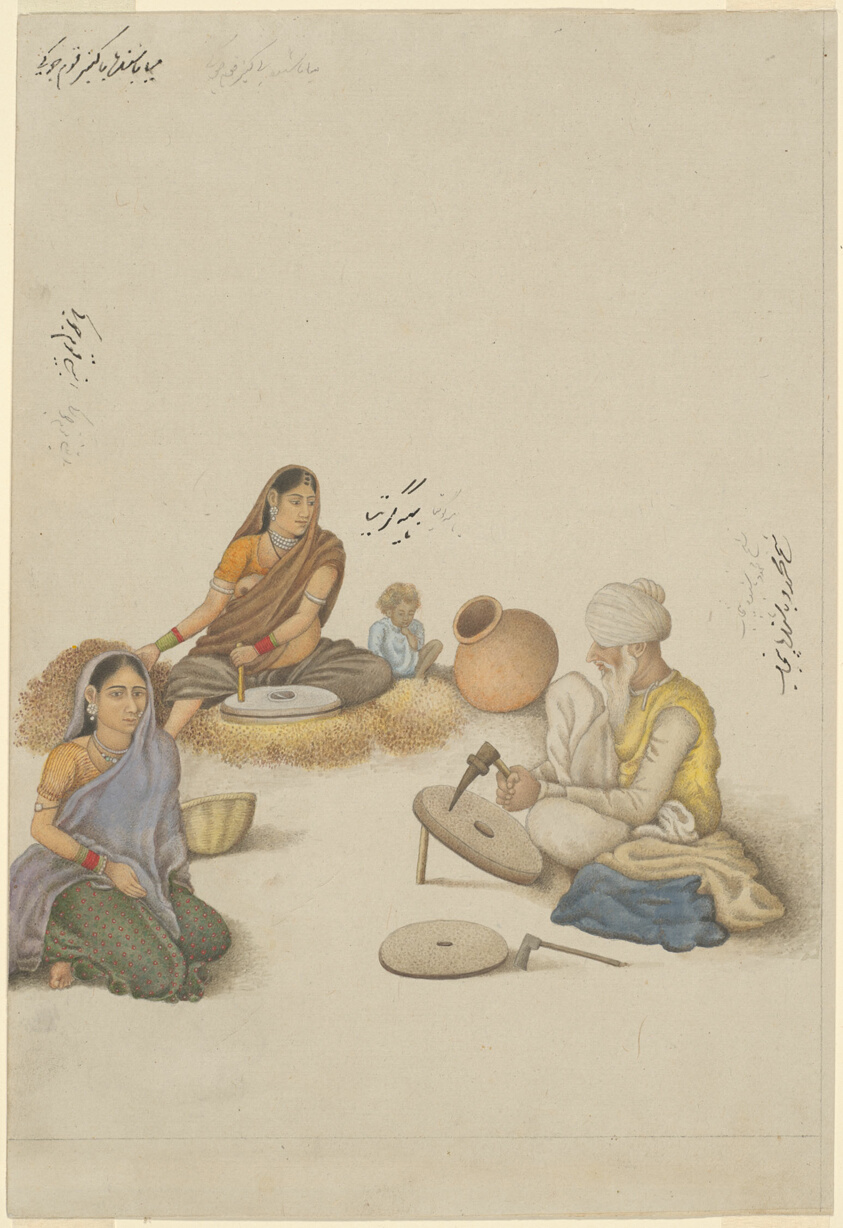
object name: Painting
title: Villagers Grinding Corn, page from the Fraser Album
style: South Asian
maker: India, Delhi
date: Company School, c. 1820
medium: Opaque watercolor on paper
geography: India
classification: miniature painting; painting; asian art